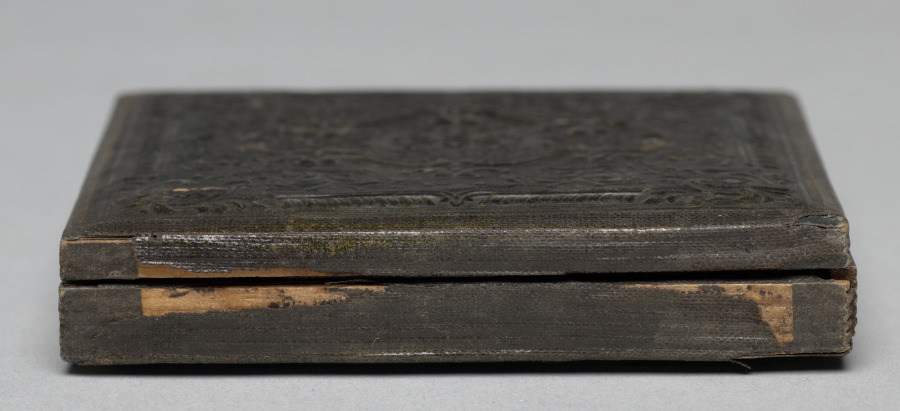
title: High Rock Tower and Stone Cottage, Lynn, Massachusetts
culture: America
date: c. 1862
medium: ambrotype, sixth plate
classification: Photograph